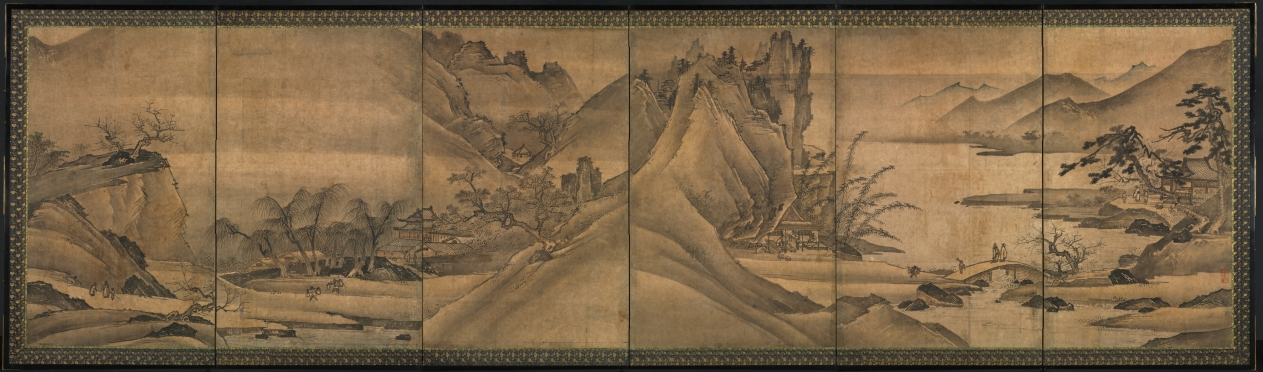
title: Landscape of the Four Seasons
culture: Korea, Joseon period (1392–1910) or Japan, Muromachi period (1392–1573)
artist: Yi Sumun (Korean, b. c. 1404)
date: late 1400s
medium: One of a pair of six-panel screens; ink and slight color on paper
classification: Painting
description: Yi Sumun is believed to have been a Korean painter who migrated to Japan in 1424 at the age of 20. This pair of screens is the artist’s most important composition in this format. Viewed from right to left, the screens show the passage of the four seasons, a popular theme in medieval Japanese ink painting.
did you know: Yi Sumun is believed to have been a 15th-century Korean man who moved to Japan at age 20 and became an influential landscape painter in Japan.